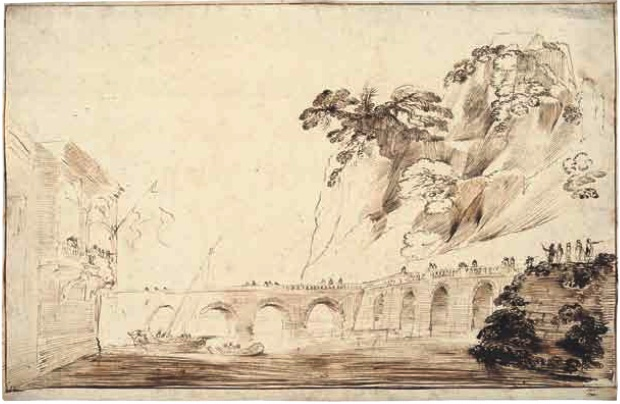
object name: Drawing and Watercolor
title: Landscape with a River Crossed by a Bridge, Lined with Spectators, Leading to a Building with an Overhanging Loggia with a Party of Onlookers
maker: Guercino (Giovanni Francesco Barbieri); Italian, 1591-1666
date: c. 1630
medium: Pen and iron-gall ink, with touches of brush and brown wash, on ivory laid paper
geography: Italy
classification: drawings (visual works); ink; paper; pen and ink drawings; prints and drawing